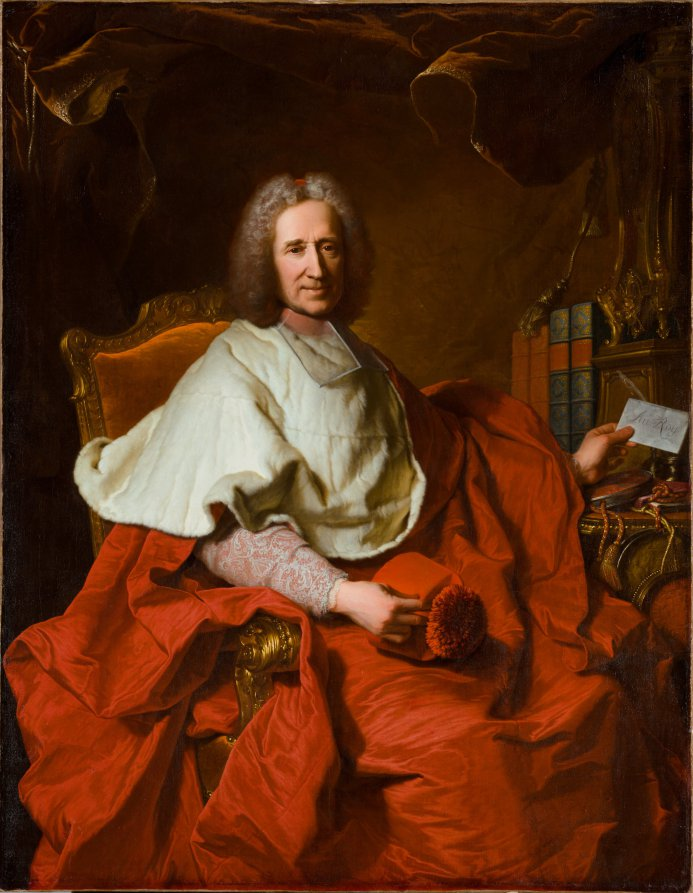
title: Portrait of Cardinal Guillaume Dubois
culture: France, 18th century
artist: Hyacinthe Rigaud (French, 1659–1743)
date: 1723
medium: oil on canvas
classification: Painting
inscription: signed on base of clock: fait par Hyacinthus Rigaud, 1723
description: With his luxurious, flamboyant dress—a voluminous wrap of scarlet silk topped by a short fur cape—the subject of Hyacinthe Rigaud’s portrait was clearly a man of consequence. Guillaume Dubois gained the favor of Louis XIV as tutor to his nephew, Philippe Charles, Duke of Orléans, and served as chief minister under Louis’s successors, the regent Duke of Orléans and Louis’s great-grandson, Louis XV. Dubois was appointed a Cardinal in the Catholic Church in 1721, a lofty aspiration at least partly motivated by political ambition: the title gave him the ability to remove political adversaries with impunity. Dubois holds a letter with the words Au Roy (to the king); this portrait was painted in the same year the young Louis XV ascended to the throne.